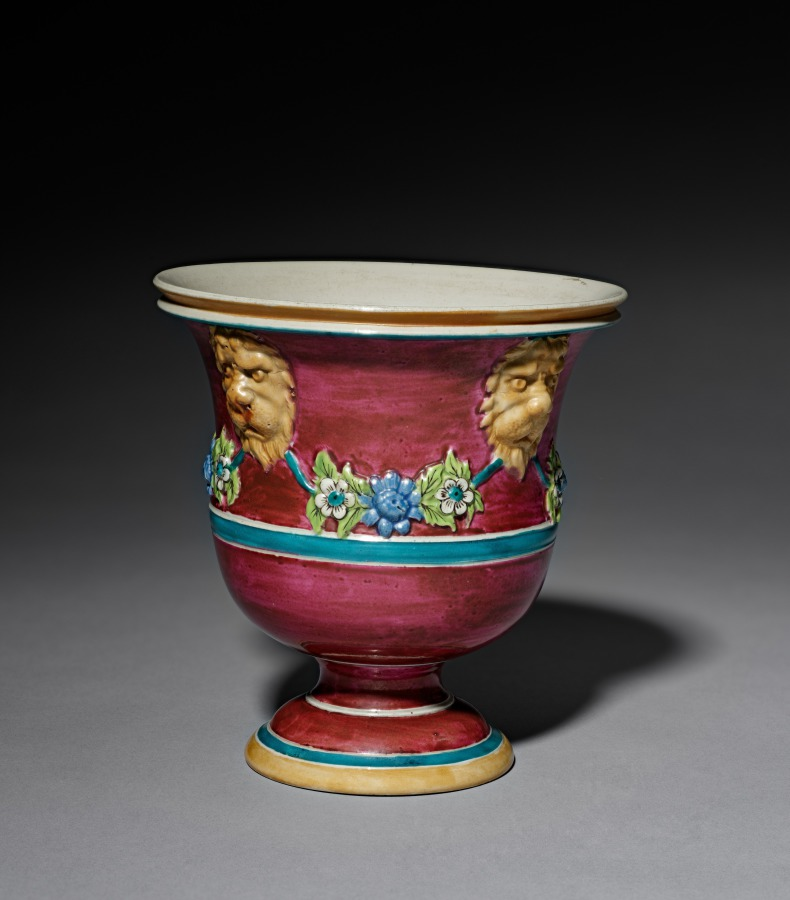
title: Jardinière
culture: England, Staffordshire, 18th century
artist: Staffordshire Factory (British)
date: c. 1760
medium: salt-glaze earthenware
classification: Ceramic